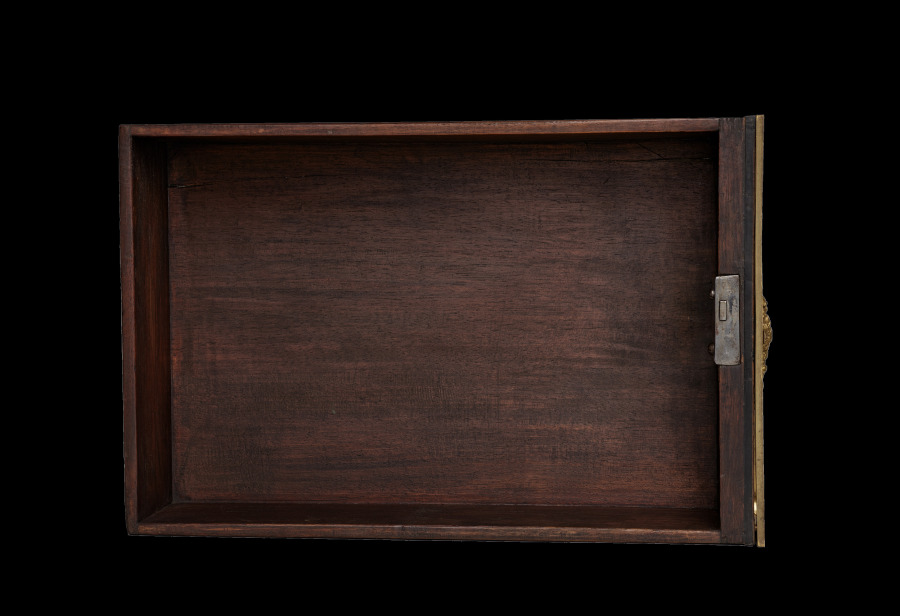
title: Side Drawer for Cabinet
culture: France, late 17th Century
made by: André-Charles Boulle (French, 1642–1732)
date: c. 1690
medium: ebony, marquetry in metal and tortoise shell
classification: Furniture and woodwork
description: Appointed cabinetmaker to King Louis XIV in 1672, André-Charles Boulle became a master of furniture making in France during the late 1600s until his death in 1732. Known primarily for his use of marquetry, in which metal patterns are inlaid into tortoiseshell then applied within the veneered surface of the furniture, Boulle established a level of quality and craftsmanship few others could achieve. As a result, his work found favor at the royal court and among other aristocrats and diplomats eager to impress the king. The inclusion of a medallion depicting Louis XIV within the bronze decoration of this chest would have identified the owner with the royal court. Often exhibiting stout architectural proportions with elegant groups of inlaid motifs such as the parrot on the central panel of this chest, Boulle’s designs are an example of the intellectual fashion for contrasting ideas, materials, and motifs.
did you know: Originally designed to sit atop an elaborate tall stand, this chest was likely altered in the late 1700s to reduce its scale and height.